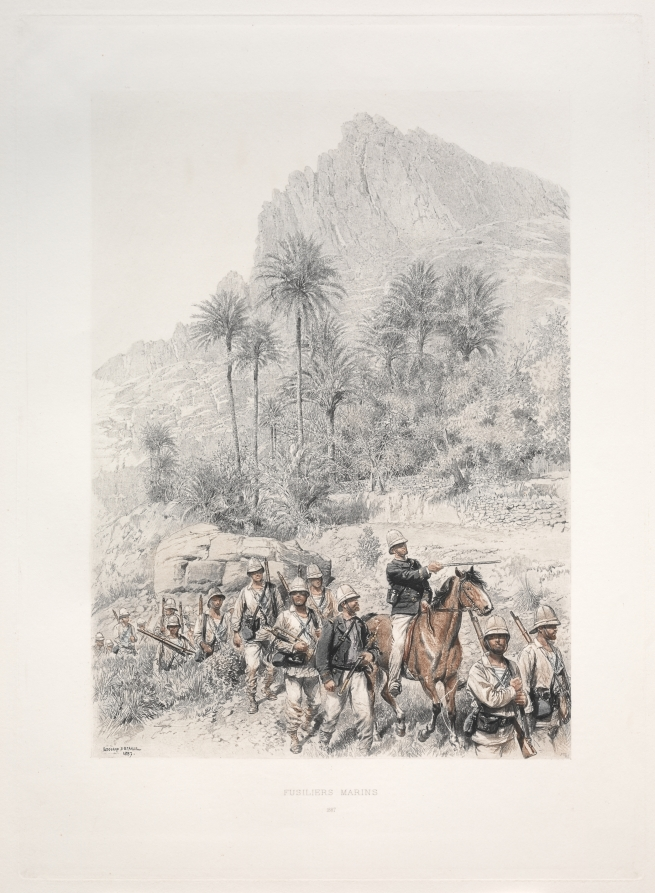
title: Riflemen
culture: France, 19th century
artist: Édouard Detaille (French, 1848–1912)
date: 1887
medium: color photogravure of drawing enhanced with roulette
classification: Print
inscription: in plate, lower left: E. Detaille